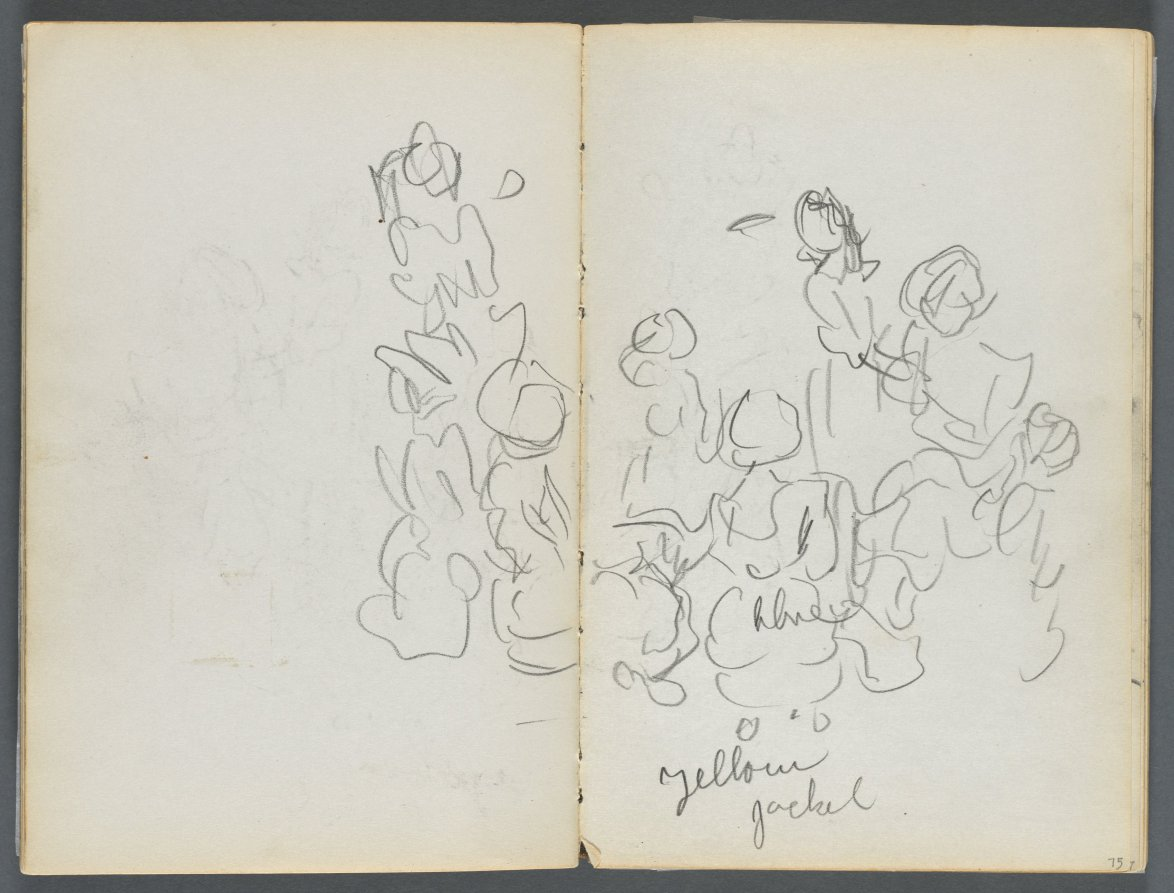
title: Sketchbook, The Dells, N° 127, page 074 & 75: Figures with color notations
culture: America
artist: Maurice Prendergast (American, born Newfoundland [now Canada], 1858–1924)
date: c. 1919–1921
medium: graphite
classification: Bound Volume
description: This sketchbook contains 59 pages of graphite drawings and 16 watercolors made at various locations on Cape Ann, Massachusetts.